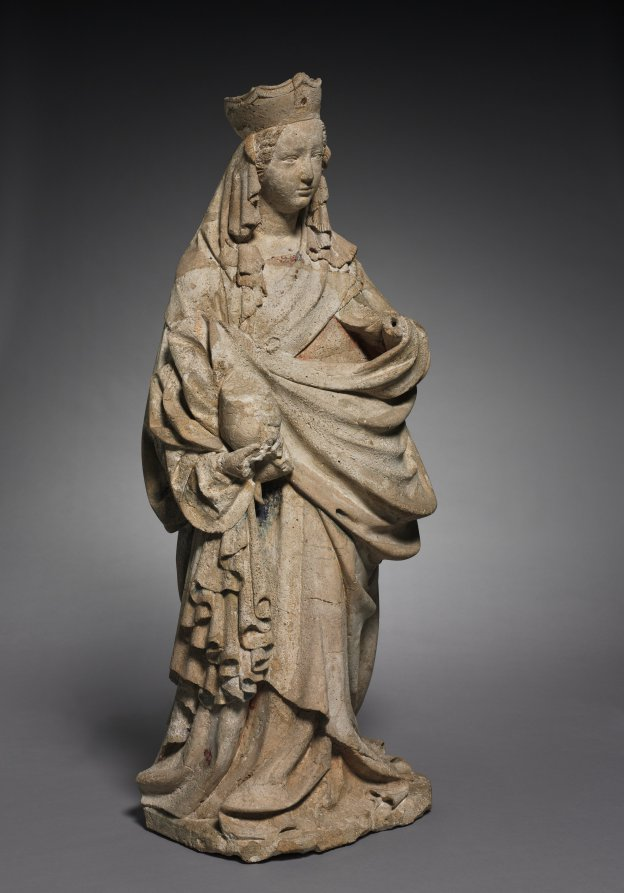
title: Virgin and Child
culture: Austria, Lungau, Church of Mariapfarr, late 14th century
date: c. 1395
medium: cast stone with traces of original paint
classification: Sculpture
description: This sculpture—damaged during the 1800s and now missing the figure of the Christ child—is a fine early example of the type known as the Schöne Madonna or "Beautiful Virgin." This type became popular around 1400 and emphasized the graceful curve of the Virgin’s posture combined with deep, slightly exaggerated drapery folds. This sculpture is known to have come from the Church of Mariapfarr in the Diocese of Salzburg. It was made using a casting technique known as "lost shape." The casting consisted of pulverized limestone combined with quicklime and milk curd poured into a mold. After the cementlike mixture set for several weeks, the mold was destroyed to remove the sculpture, which could then be filed, polished, and painted.